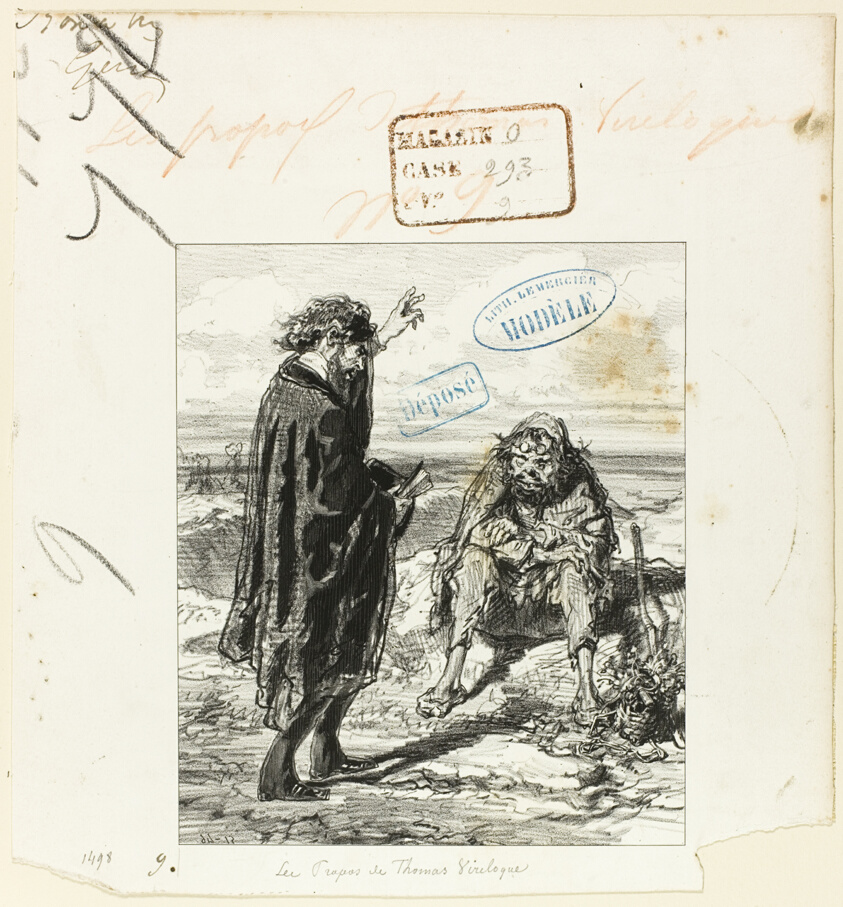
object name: Print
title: Les Propos de Thomas Vireloque: Man the Masterpiece of Creation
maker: Paul Gavarni (French, 1804-1866)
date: 1852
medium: Lithograph in black on cream wove paper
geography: France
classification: lithograph; print; prints and drawing